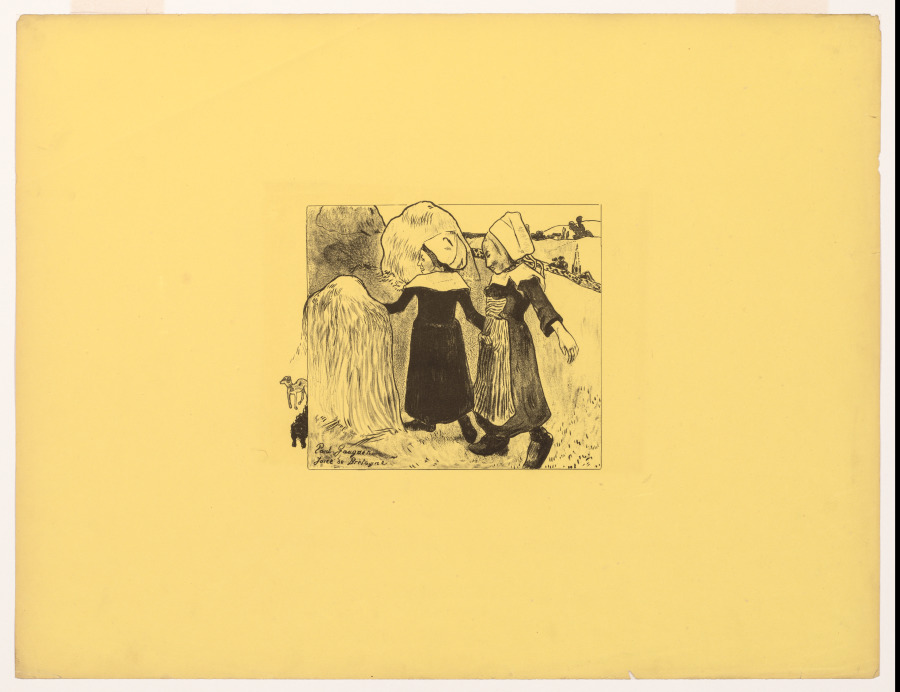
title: Volpini Suite: Joys of Brittany (Joies de Bretagne)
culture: France, 19th century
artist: Paul Gauguin (French, 1848–1903)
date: 1889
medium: zincograph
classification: Print